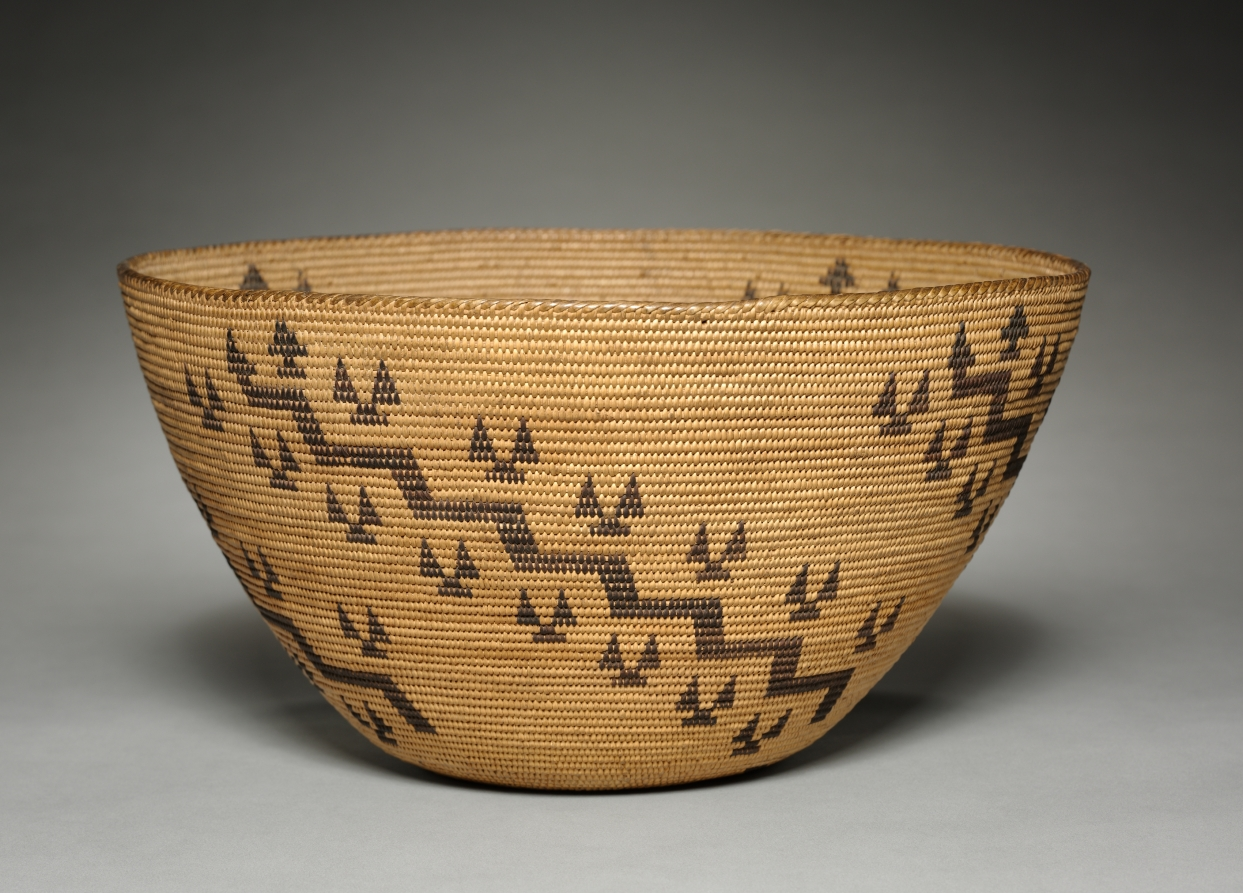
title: Cooking Bowl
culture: California, Mono, Lake Paiute, late 1800s–early 1900s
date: 1890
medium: willow, bracken fern; coiled (3 rods)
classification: Basketry